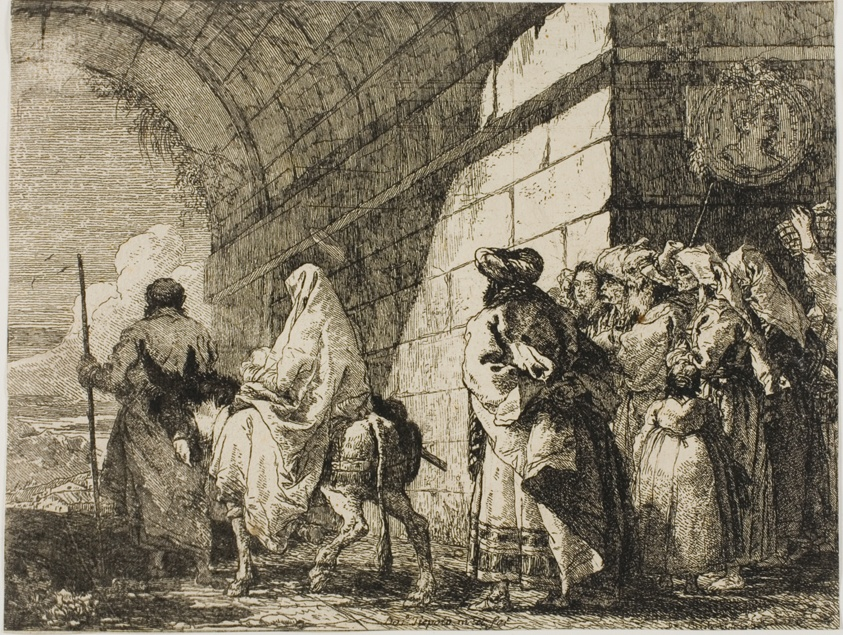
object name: Print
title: The Holy Family Leaving by a City Gate, plate seven from The Flight into Egypt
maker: Giovanni Domenico Tiepolo (Italian, 1727-1804)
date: 1753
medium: Etching on paper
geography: Italy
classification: etching; print; prints and drawing